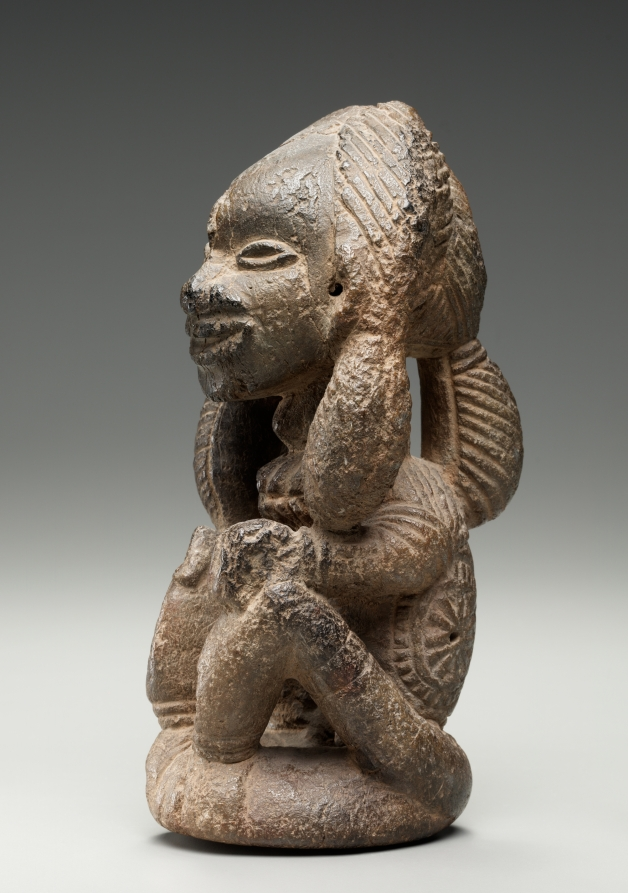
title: Figure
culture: Africa, West Africa, Sierra Leone, Sapi-style carver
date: possibly early 1400s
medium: soapstone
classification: Sculpture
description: The most varied group of soapstone figures and heads has been found in the homelands of the Kissi. Calling them pomda ("images of the dead"), the Kissi placed them in ancestral shrines, offering them the last seeds at sowing times and the first fruits of the harvest. However, the sculptures are believed to have been made centuries ago by the ancestors of the Kissi, the so-called Sapi people.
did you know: Sapi sculptors worked in stone—like in this sculpture—as well as ivory.